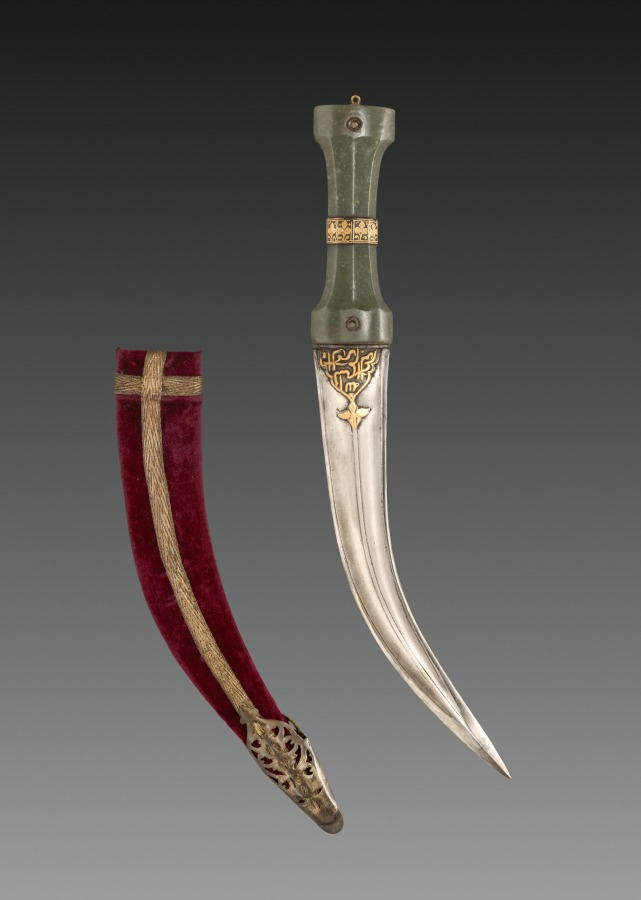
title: Khanjar dagger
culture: India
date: c. 1600s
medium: Jade hilt with iron and gold; steel blade with iron and gold; wood sheath covered in velvet with metallic thread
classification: Arms and Armor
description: Daggers with curved blades, known as khanjar, were worn tucked into the belt as one of the basic accessories for Mughal men. An all-purpose knife that could be used in hunting or fighting, the khanjar was also a visible status symbol. The use of jade and gold indicates that this dagger was owned by a member of the court. The gold inscriptions on the blade, just under the hilt, are quotations from the Qur’an, the most sacred book for Muslims. On one side is the opening line: “In the Name of God the Merciful and the Compassionate,” and on the other is a popular verse from chapter (sura) 61: “Help comes from God, and Victory is imminent.”